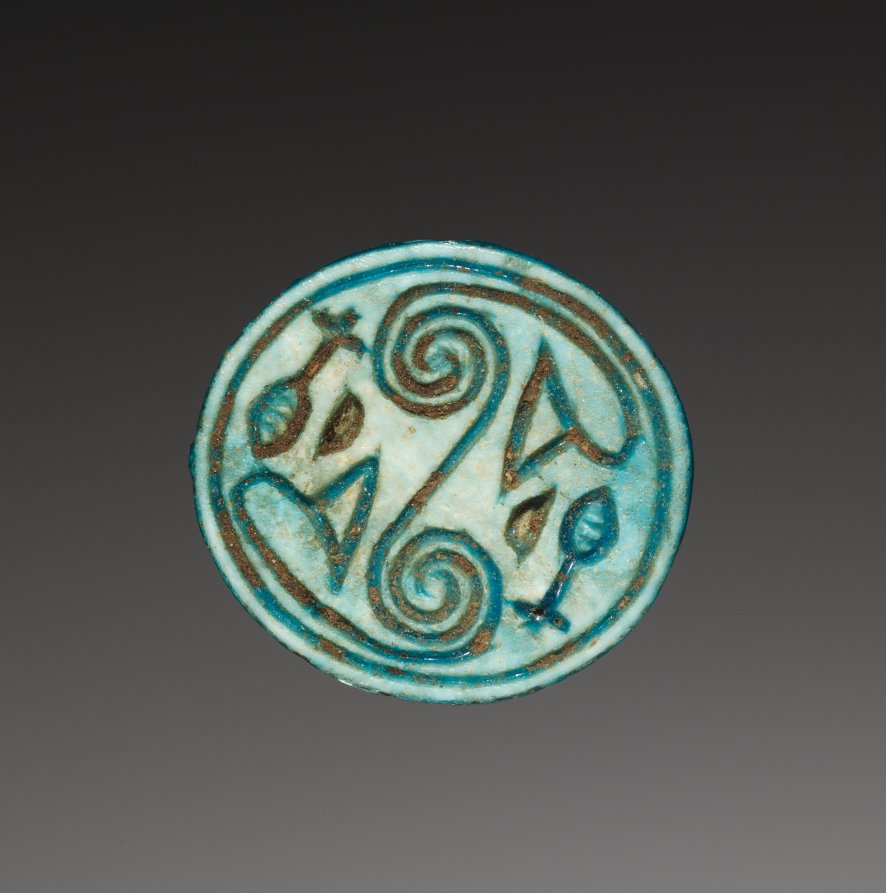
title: Scaraboid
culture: Egypt, Middle Kingdom (2040–1648 BCE)–Second Intermediate period (1648–1540 BCE)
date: 1980–1540 BCE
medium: turquoise-glazed steatite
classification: Seals